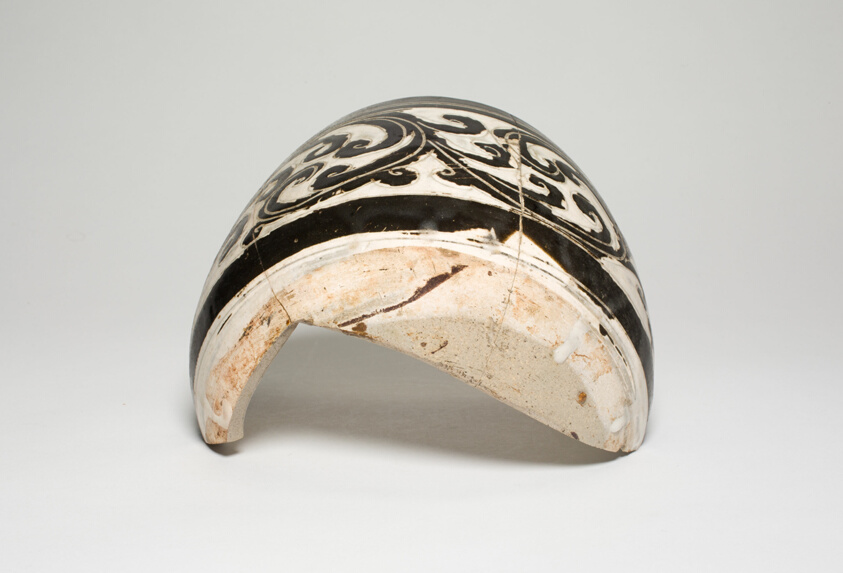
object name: Vessel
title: Fragment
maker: China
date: Song dynasty (960–1279)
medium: Stoneware with black glaze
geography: China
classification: porcelain; asian art; ceramics